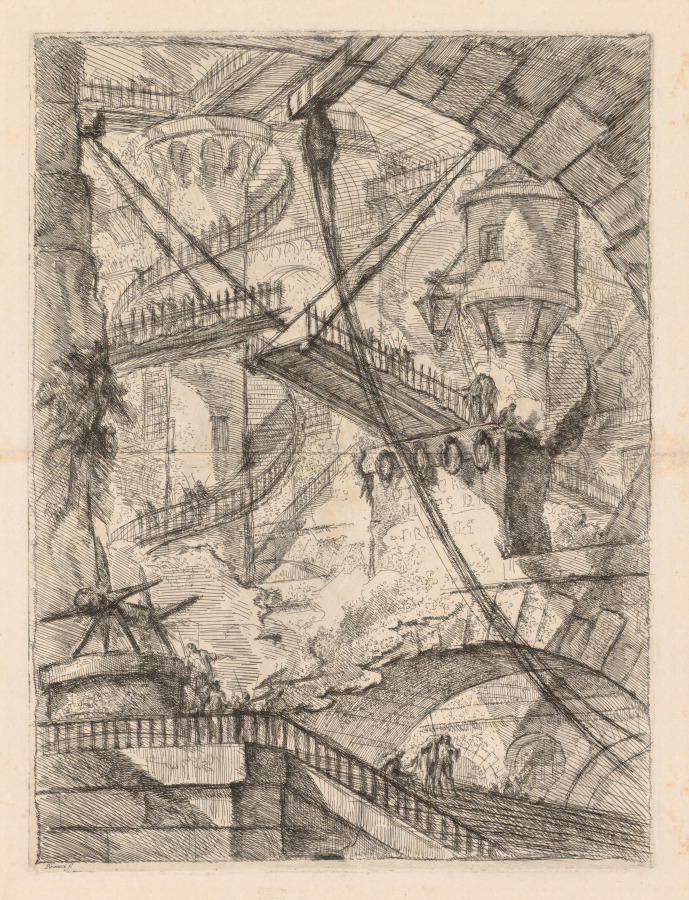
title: The Prisons: An Immense Interior with a Drawbridge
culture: Italy, 18th century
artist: Giovanni Battista Piranesi (Italian, 1720–1778)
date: 1745–1750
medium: etching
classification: Print